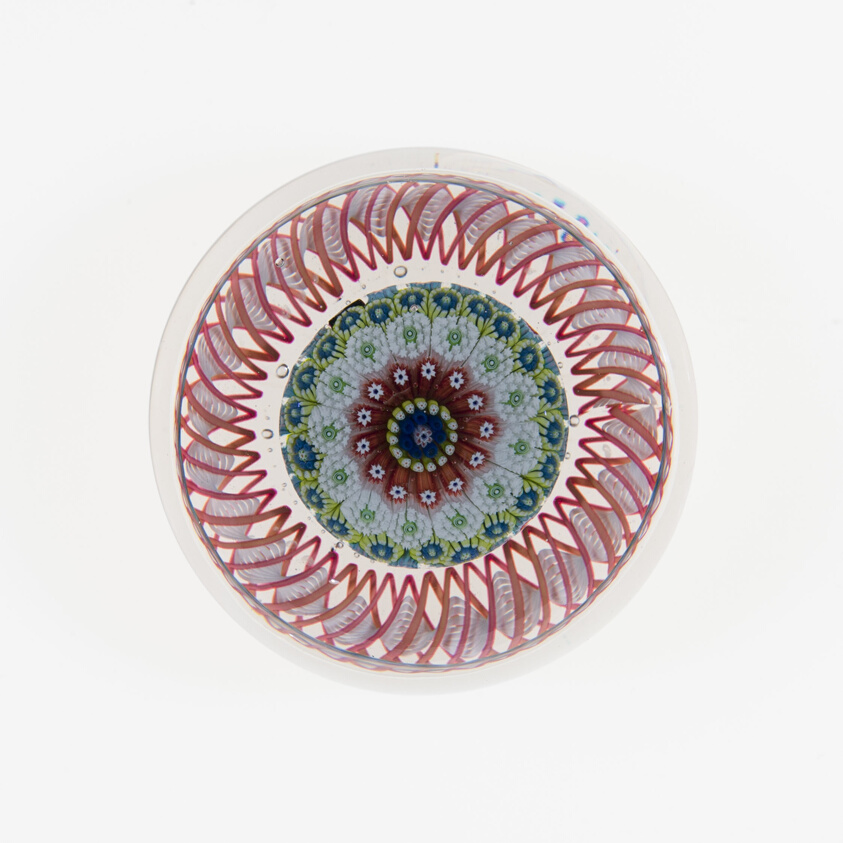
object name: Glass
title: Paperweight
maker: Saint-Louis Glassworks (Cristalleries de Saint-Louis); Lorraine, France, founded 1586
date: c. 1845–60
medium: Glass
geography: Saint-Louis-lès-Bitche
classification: paperweight; glass